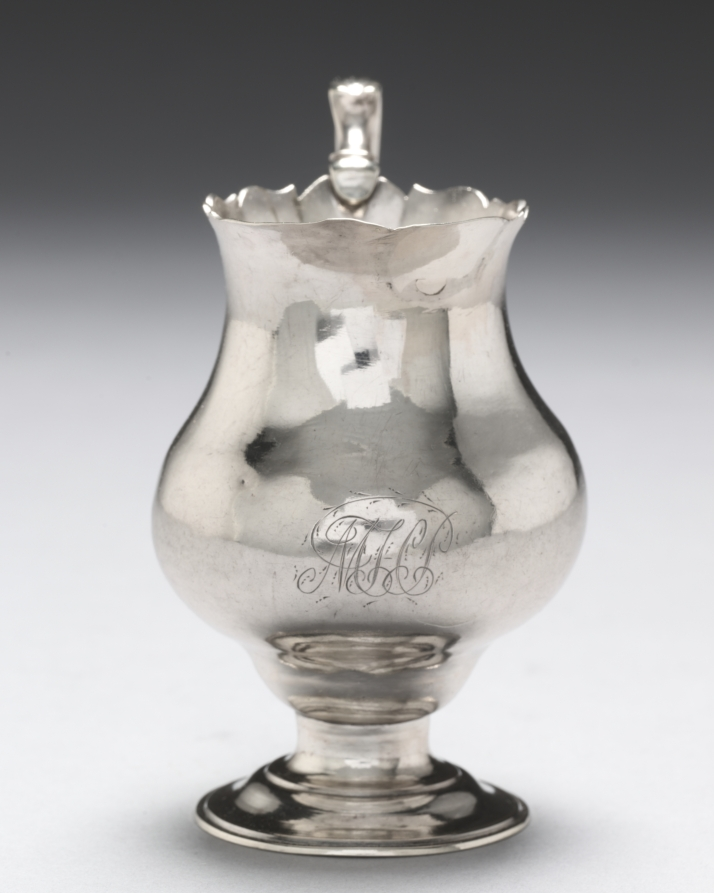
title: Cream Pitcher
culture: America, Massachusetts, Boston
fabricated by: Paul Revere II (American, 1735–1818)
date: c. 1765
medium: silver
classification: Silver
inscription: "P . . .H/to/P . . .E" in block letters under foot, and "MHP" in bright-cut script on front, opposite handle.